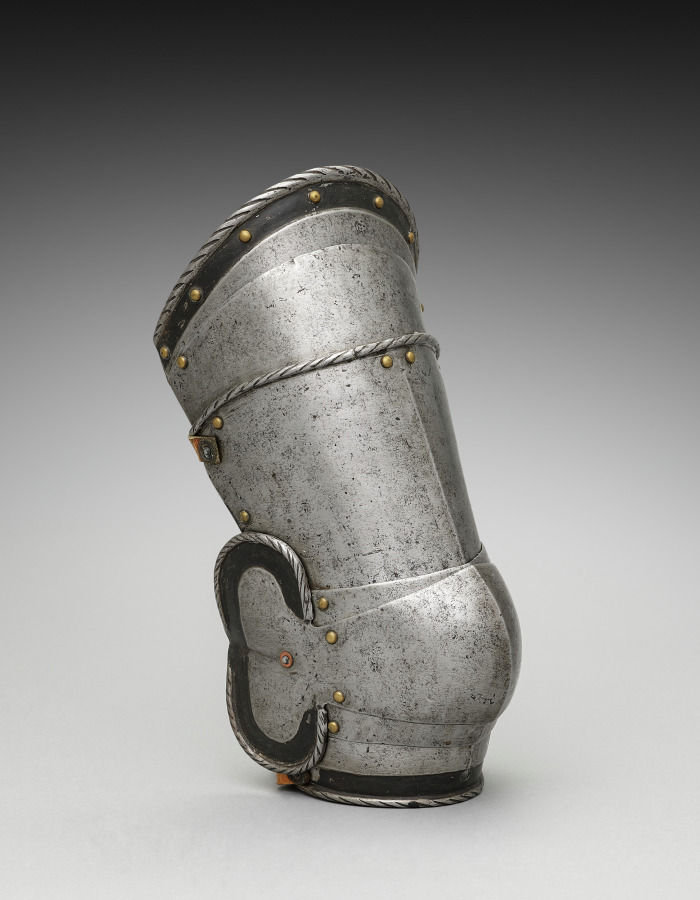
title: Right Cuisse with Poleyns (knee-cops)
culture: Germany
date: c.1550–1570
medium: iron, steel, leather and brass rivets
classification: Arms and Armor